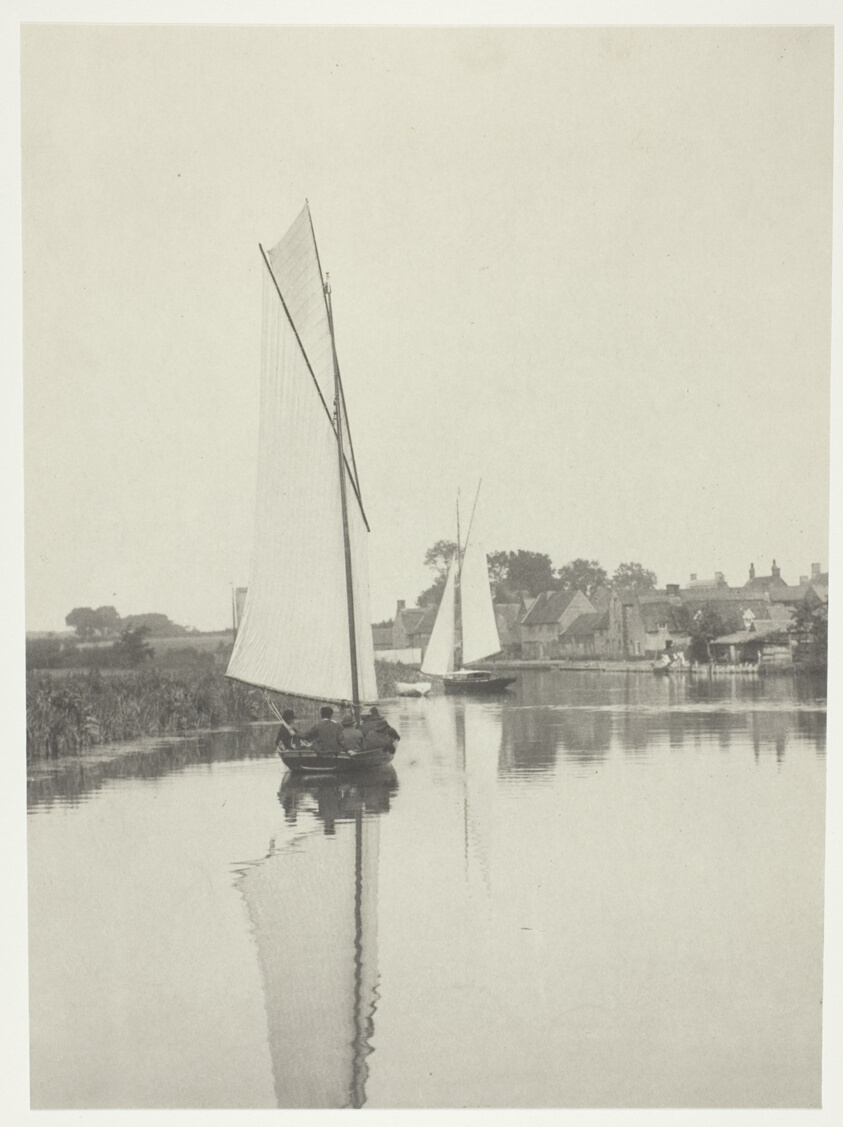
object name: Photograph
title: The Village of Horning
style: 19th century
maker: Peter Henry Emerson (English, born Cuba, 1856–1936)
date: 1886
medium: Platinum print, pl. V from the album "Life and Landscape on the Norfolk Broads" (1886)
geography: England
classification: platinum print; photographic process; photography; photograph